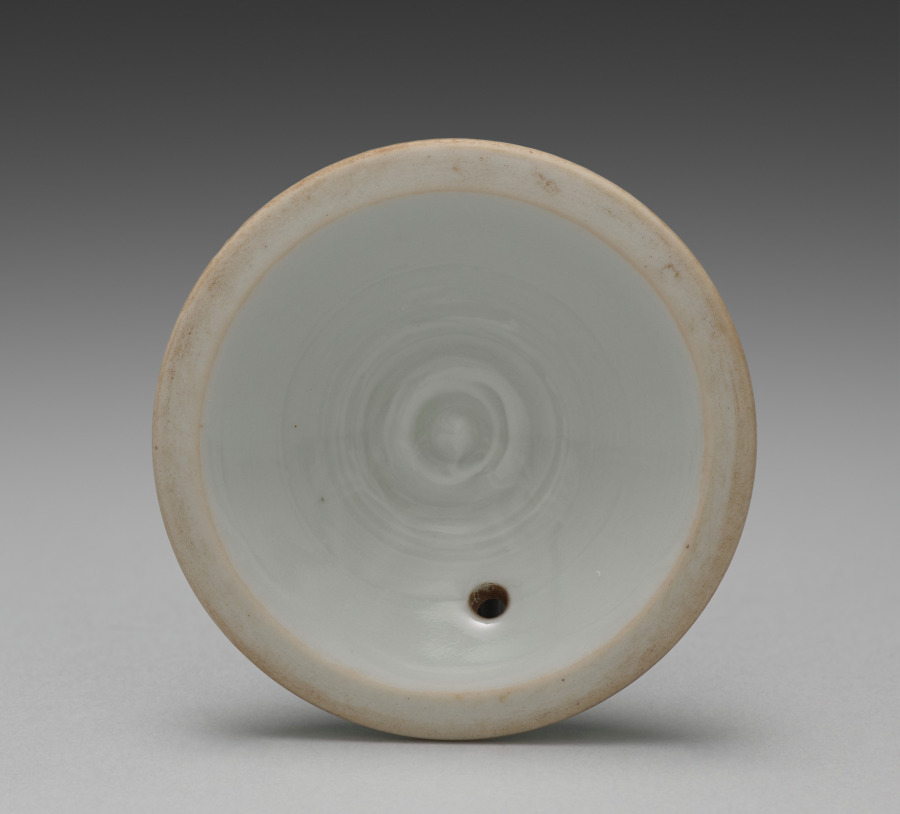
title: Lid for a Teapot with Cherry at Night in Gion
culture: Japan, Meiji period (1868–1912)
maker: Seifū Yohei III (Japanese, 1851–1914)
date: 1893–1914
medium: Porcelain with underglaze blue and iron oxide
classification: Ceramic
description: This side-handled sencha teapot with the cherry tree has a nearly spherical shape, and its recessed lid has an ovoid knob. It has both blue and a purplish brown under the glaze for the blossoms and embers on one side, and the vertical calligraphy identifies the tree as a cherry tree at night in the Gion area of Kyoto. To the right of the tree, smoke billows from a small lantern fire in a basket suspended on a post. In terms of collecting history, a paper inserted into the box of Teapot with Cherry at Night in Gion is of interest. It is a flyer for Yamamoto Shōseidō, a shop (no longer extant) that sold fine Kyoto ceramics in Osaka.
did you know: This teapot features the Japanese theme of a blossoming cherry tree in the Gion area of Kyoto in underglaze blue and brown.